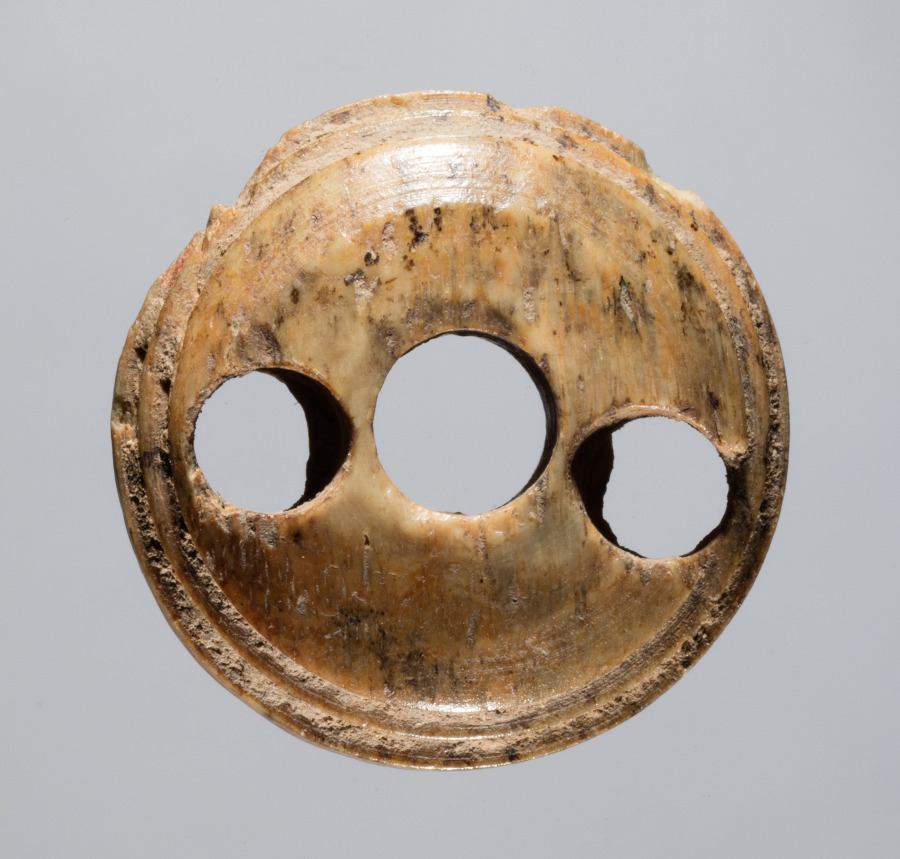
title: Spindle Whorl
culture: Iran, early Islamic period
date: 700s - 900s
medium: bone, incised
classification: Spindle Whorl